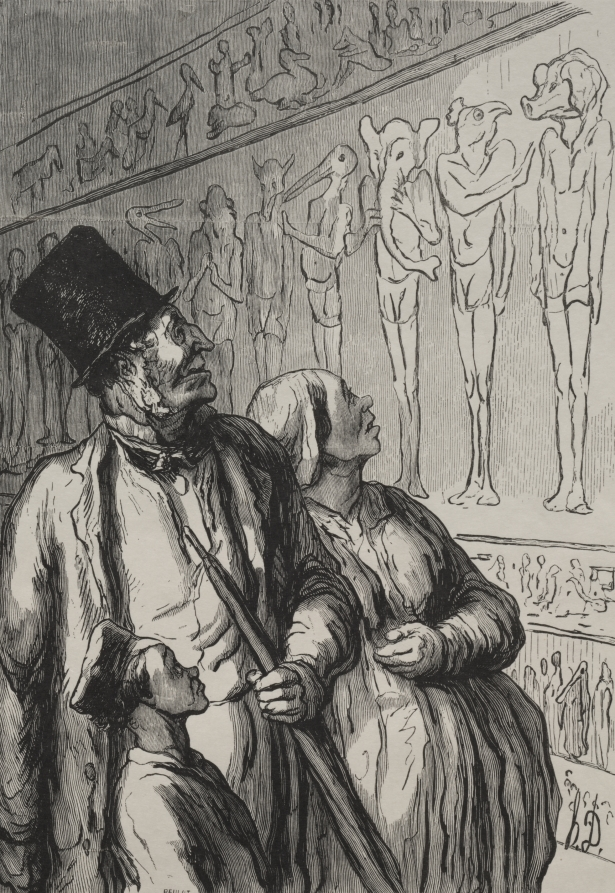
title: The Universal Exhibition: The Egyptians Section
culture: France, 19th century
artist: Honoré Daumier (French, 1808–1879)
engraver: Julien Antoine Peulot (French, 1827–1927)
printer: François Louis Schmied (Swiss, 1873–1941)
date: 1867, printed 1920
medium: wood engraving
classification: Print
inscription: Lower margin, in pencil: 40/75 ; red stamp: FLS